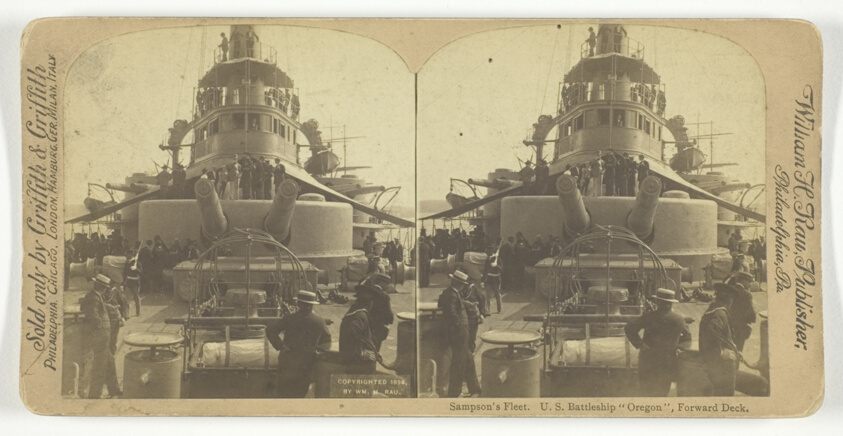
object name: Photograph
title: Sampson's Fleet. U.S. Battleship "Oregon", Forward Deck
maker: William H. Rau (American, 1855-1920)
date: 1898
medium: Albumen print, stereo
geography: Philadelphia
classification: photography; photograph